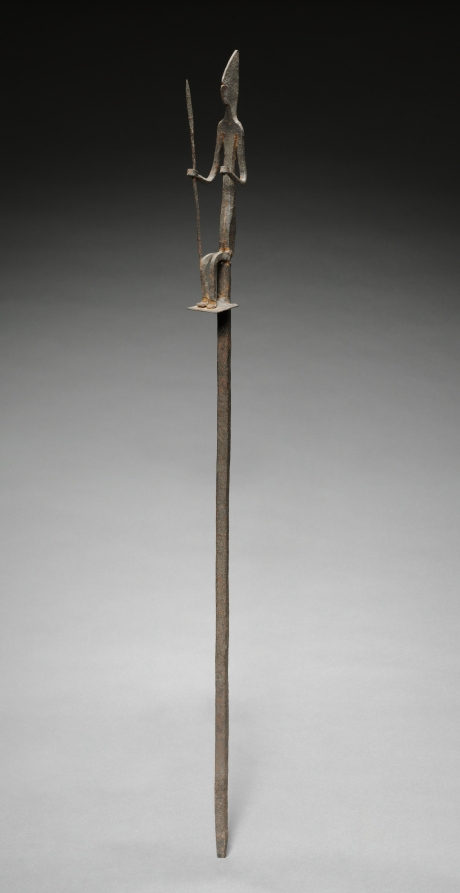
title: Staff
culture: Africa, West Africa, Mali, Bamana-style blacksmith-carver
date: 1900s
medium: Iron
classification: Implements